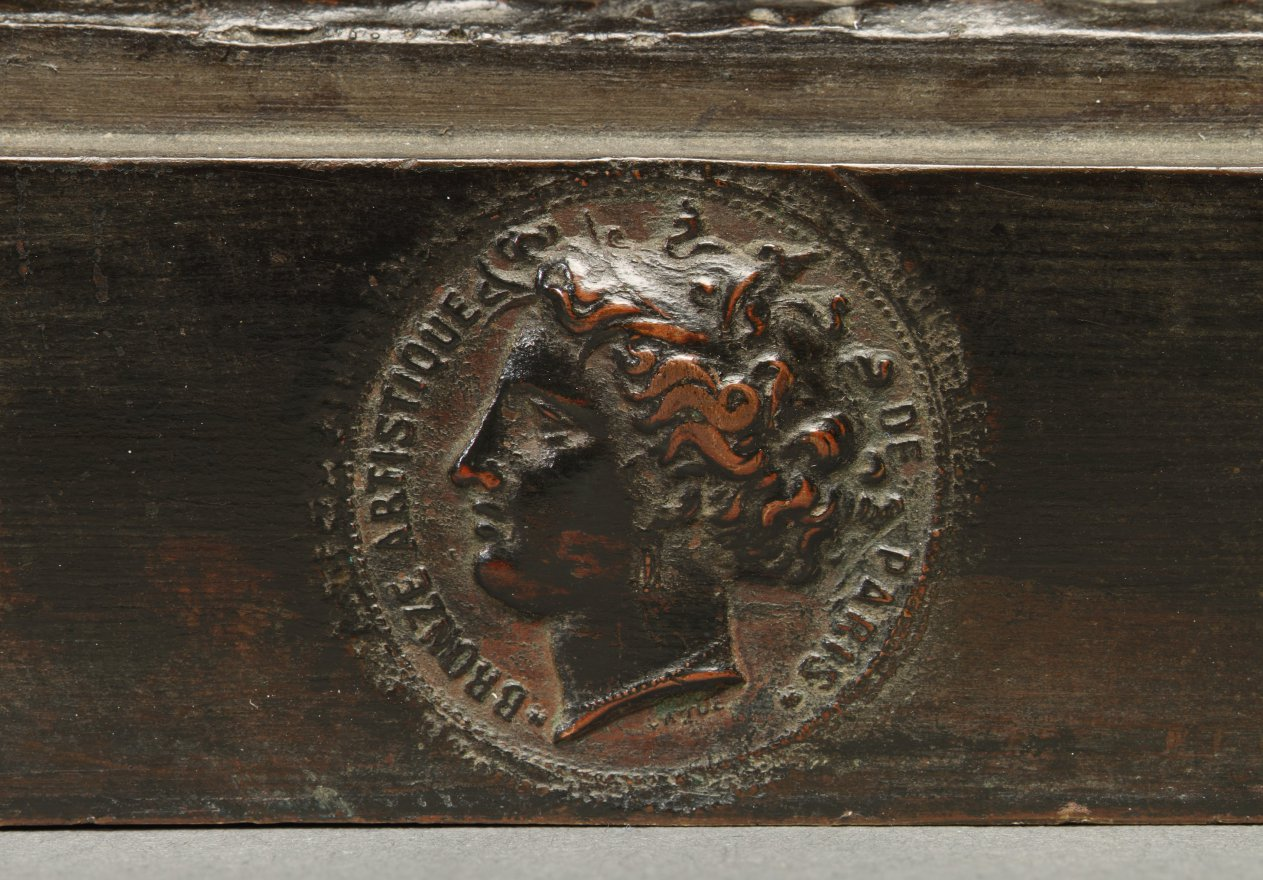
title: Ariadne on a Panther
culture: France, 19th century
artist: Jean-Baptiste Clésinger (French, 1814–1883)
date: 1873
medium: bronze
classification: Sculpture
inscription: signed on side of base: "J. CLESINGER"; inscribed around edge of stamp: "BRONZE ARTISTIQUE/DE PARIS"; on cut of neck of woman, "CAYUZ"; on edge of base: "1 Rue de la PAIX."